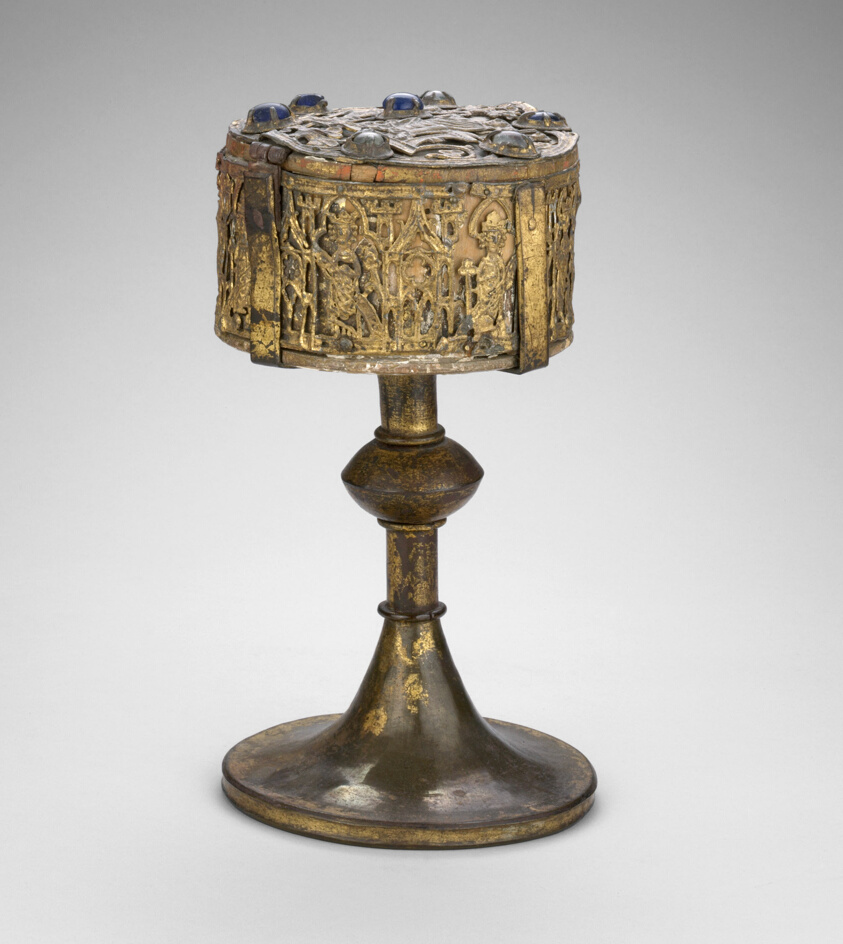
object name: Metalwork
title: Footed Pyx Used as a Reliquary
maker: German; probably Brunswick (Braunschweig)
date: 14th century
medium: Gilded pewter over a wood core, gilt copper, gemstones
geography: Brunswick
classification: wood; european decorative arts; decorative arts; reliquary; religious